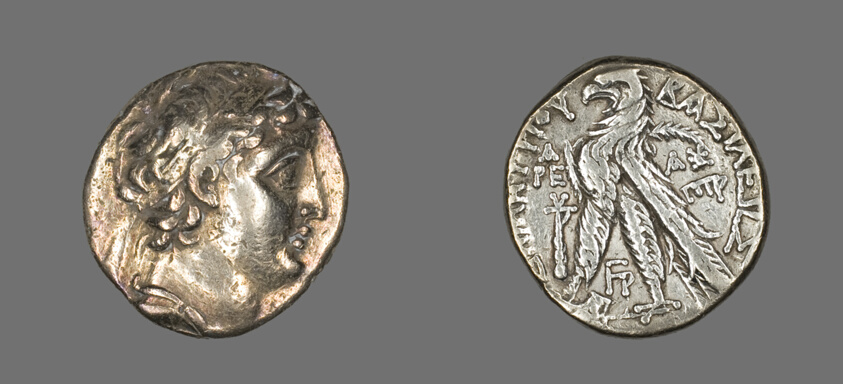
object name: Coin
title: Tetradrachm (Coin) Portraying Demetrius II Nikator of Syria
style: greek, ancient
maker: Greek, minted in Tyre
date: 130-129 BCE, Reign of Demetrius II Nikator of Syria, 145–139 BCE and 129–125 BCE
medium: Silver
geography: Tyre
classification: coin; ancient art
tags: king, eagles